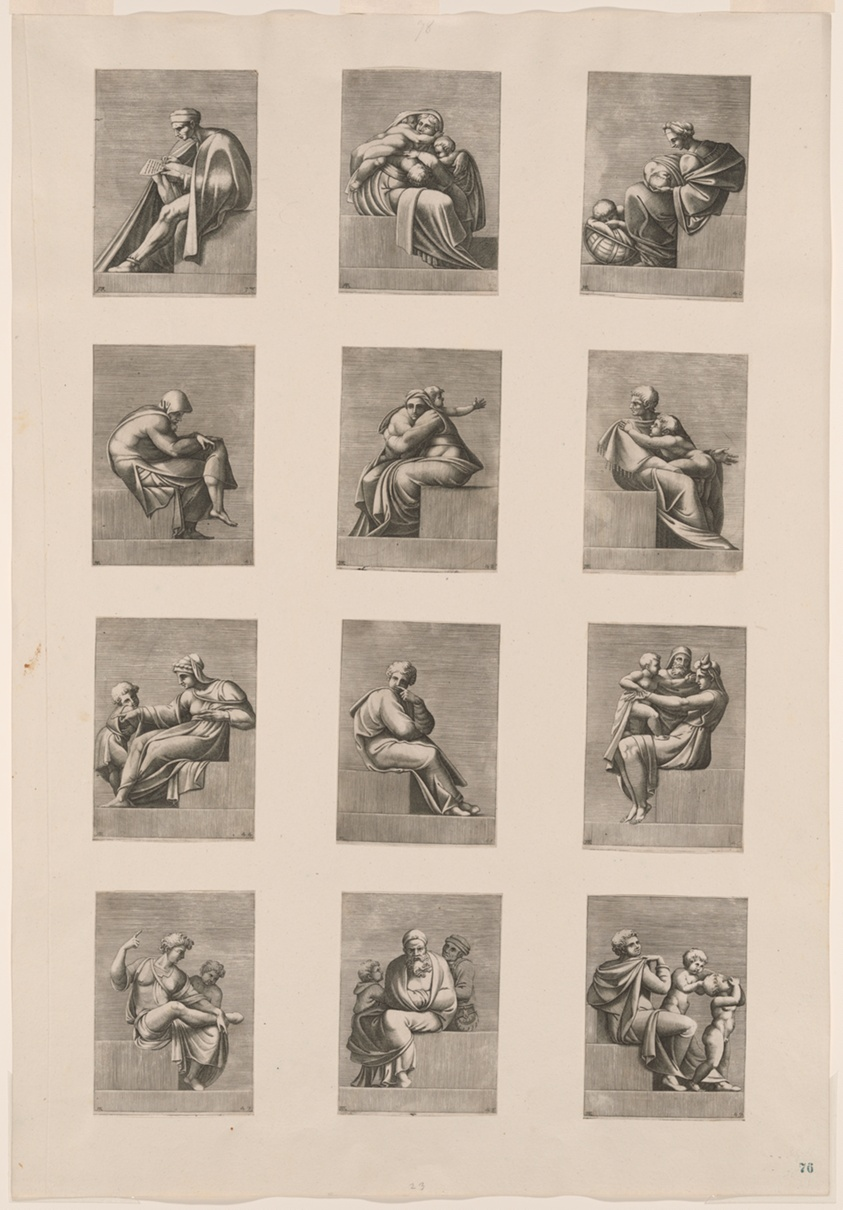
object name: Print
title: Figures from the Ceiling of the Sistine Chapel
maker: Adamo Scultori (Italian, c. 1530–1585); after Michelangelo Buonarroti (Italian, 1475–1564)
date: 1550/65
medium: 72 engravings in black on cream laid paper, tipped onto album sheet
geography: Italy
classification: engraving; paper; prints and drawing; print